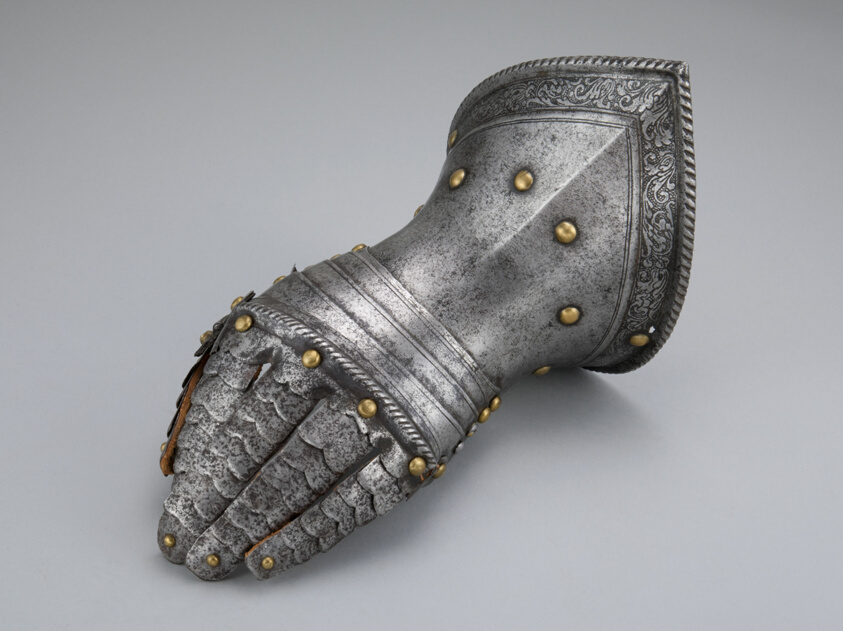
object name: Armor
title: Fingered Gauntlet for the Left Hand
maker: Northern Italian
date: c. 1560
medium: Steel, leather, and brass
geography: Northern Italy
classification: suit-gauntlet; armor; arms and armor